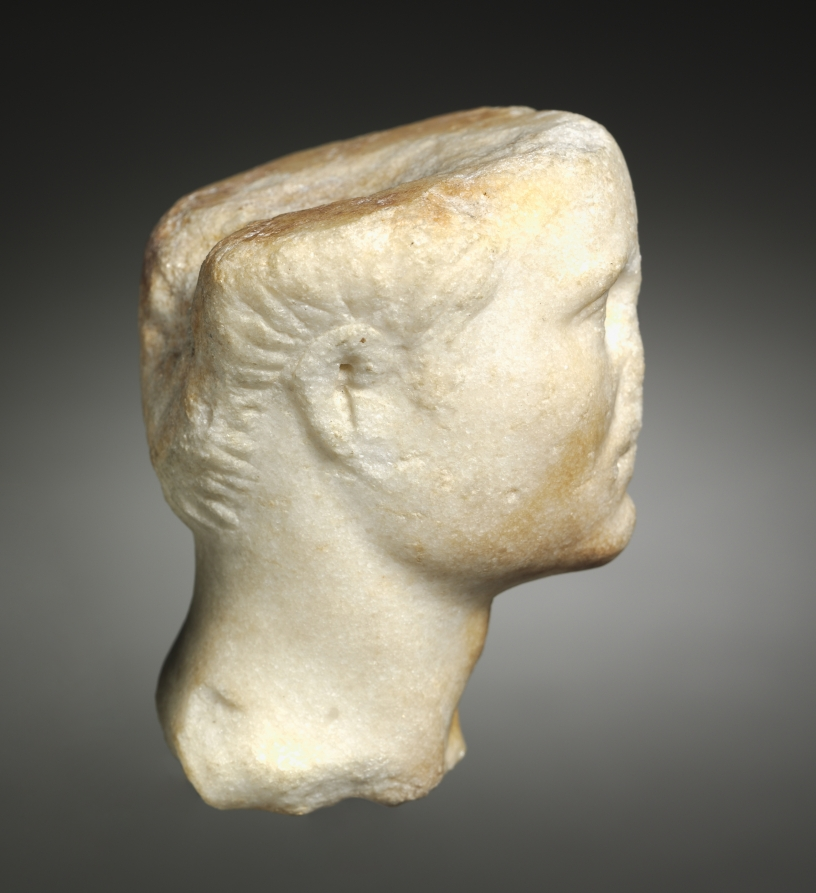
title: Fragment: Head of a Man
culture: Greco-Roman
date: 100 BCE–100 CE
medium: marble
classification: Sculpture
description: This small marble portrait of a man is heavily damaged, with weathering on the face, a break at the neck, and a large portion of the top of the head missing. It depicts a beardless youth with close-cropped hair. The flat top and back of the head may indicate that it was part of a larger composition.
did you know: Some marbles are softer than others and more vulnerable to wear.